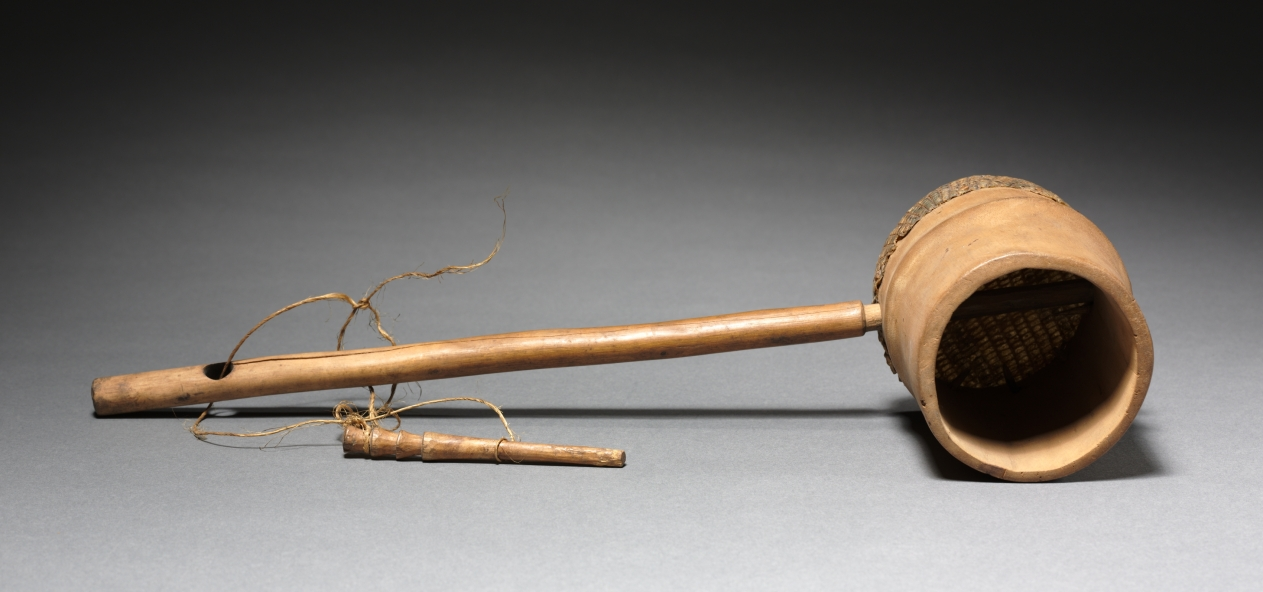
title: Spike fiddle (endingidi or iningidi)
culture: Eastern Africa, Uganda or Rwanda-Burundi, unknown maker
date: 1900s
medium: Wood, snakeskin, and plant fiber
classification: Musical Instrument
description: The endingidi is a single-stringed chordophone musical instrument. Scholars believe it was introduced into the Kingdom of Buganda (in present-day Uganda) between 1904 and 1907. From Uganda, it was later introduced to present-day Rwanda, where it is called iningidi and played by Hutu musicians. Horsehair stretched from the end of the handle and over the reptile-skin–covered tube sound box, and attached to the handle with the wooden tuning peg. A deeply curved bow, now missing, would have allowed a male musician to play the instrument as he held it vertically. Still played today, the music of the endingidi is often heard at weddings or played by royal Bugandan court musicians.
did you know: A photograph taken around 1929 shows that this instrument once had a tassle of long, black animal hair attached to the handle. This tassel beautified the instrument and gave it a dignified "clothed" presence when played at the Bugandan court.